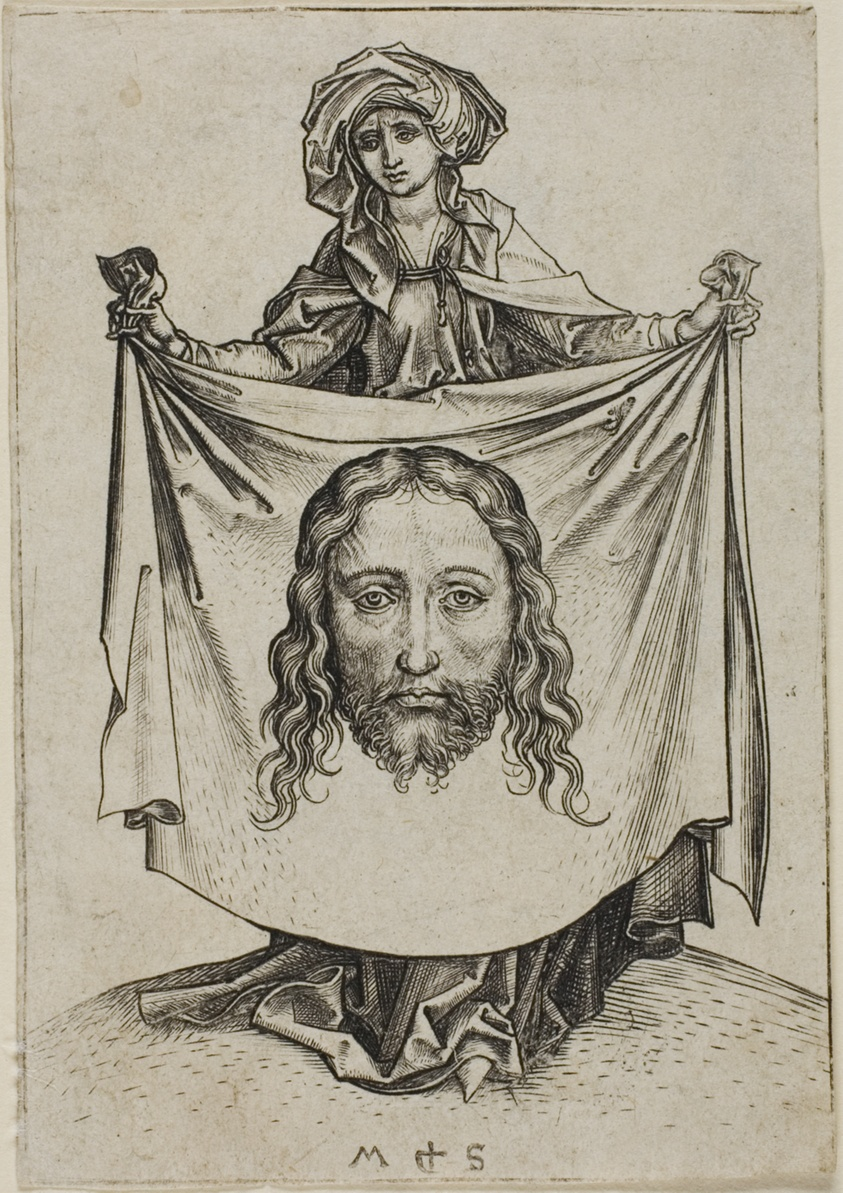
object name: Print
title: St. Veronica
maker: Martin Schongauer (German, c. 1430/50-1491)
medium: Engraving on paper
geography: Germany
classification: engraving; print; prints and drawing